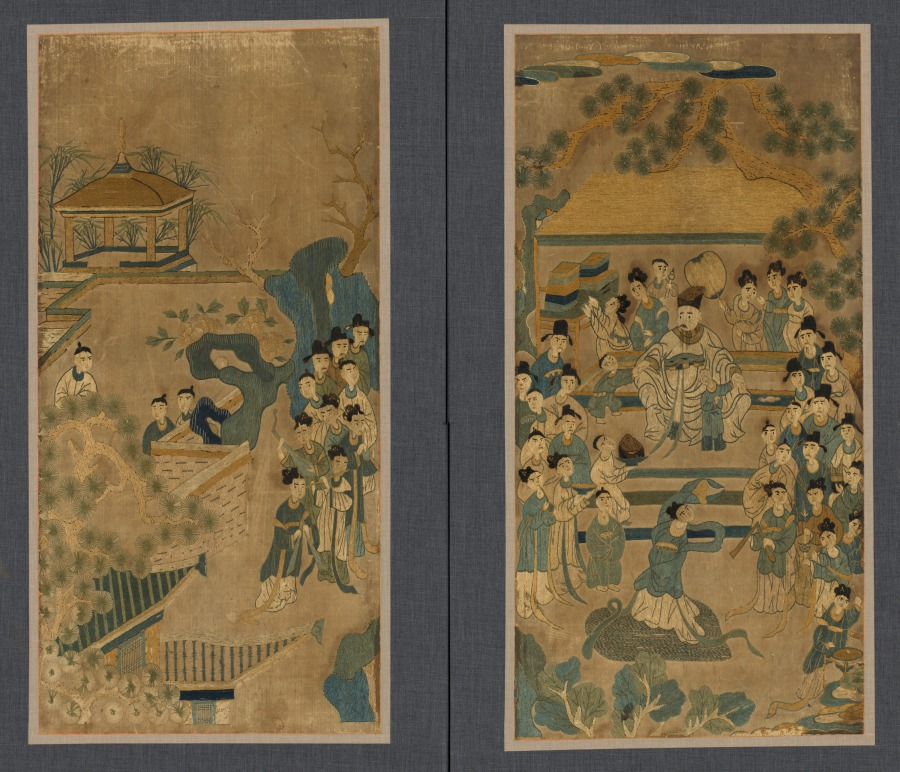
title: General Guo Ziyi’s Birthday Banquet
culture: Korea, Joseon dynasty (1392–1910)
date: early or mid-1800s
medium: Eight-panel folding screen, embroidery on silk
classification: Textile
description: The subject of this folding screen is a banquet in honor of Guo Ziyi (697–781), who is considered one of the greatest generals in Chinese history. He had a long and successful military career as well as a blissful family life. Thus, his image surrounded by his numerous family members symbolize the paragon of success and happiness. Using a wide spectrum of colorful silk threads, the artist colorfully depicts Guo enjoying his full-fledged retirement life.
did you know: This folding screen is highly likely to have been created by an amateur woman embroiderer.